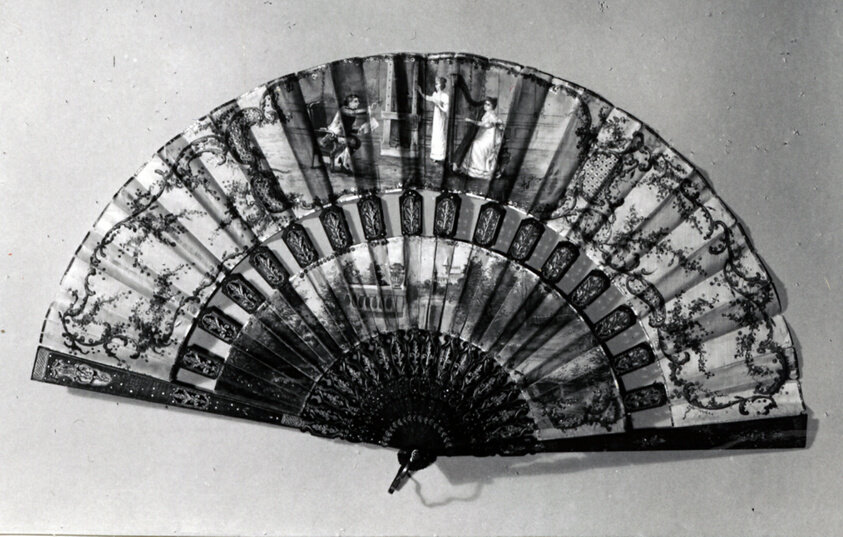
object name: Costume and Accessories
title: Fan (Cabriolet Type)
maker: France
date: 19th century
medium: Carved and painted sticks with gold incrustations; red stone rivet, silver loop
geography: France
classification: textile; fan - needlework; costume accessory - folding fan; costume